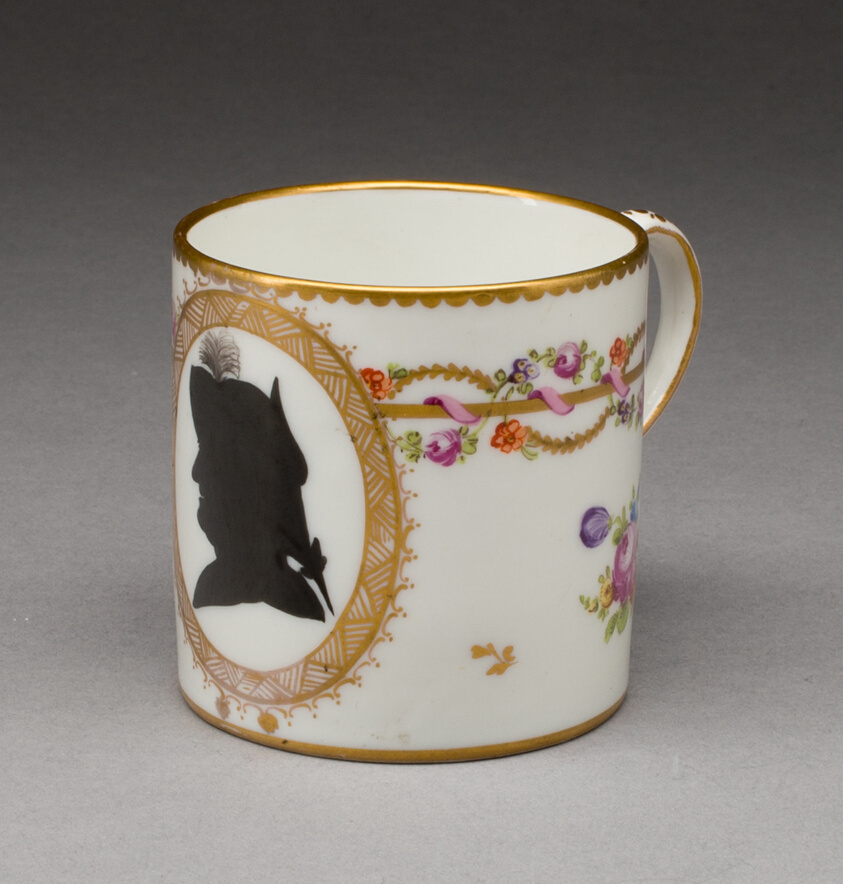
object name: Ceramics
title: Cup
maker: Nyon Porcelain Factory (Swiss, 1780-1860)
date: c. 1800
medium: Hard-paste porcelain with polychrome enamels and gilding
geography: Nyon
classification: drinking vessel; porcelain; ceramics; european decorative arts